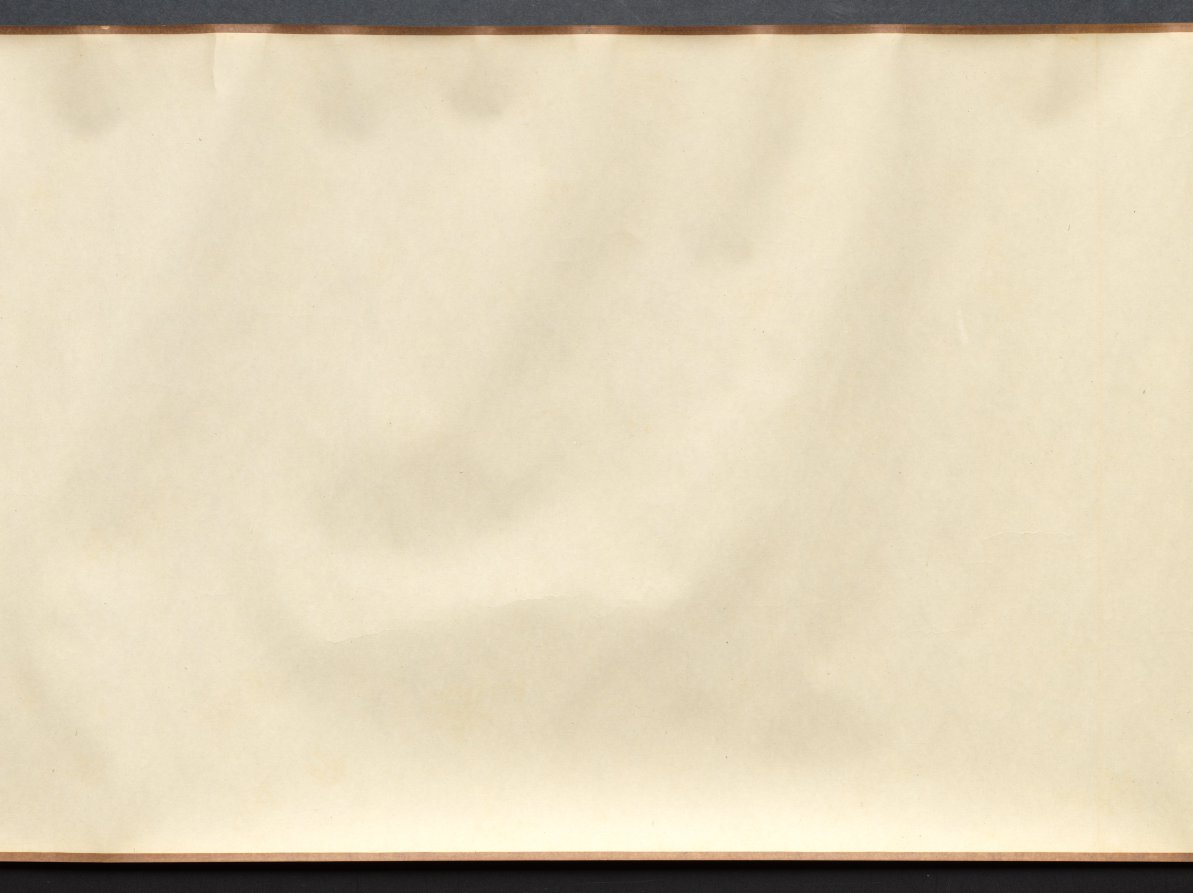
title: Returning to the Village in a Rainstorm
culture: China, Ming dynasty (1368–1644)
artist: Xie Shichen (Chinese, 1487–after 1567)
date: 1530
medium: Handscroll; ink and light color on silk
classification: Painting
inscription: 風雨歸村圖 嘉靖庚寅秋日樗仙謝時臣. [印] 謝時臣印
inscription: 3 additional seals unidentified.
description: This scroll depicts a wind- and rainswept landscape with figures in the countryside struggling against a late summer monsoon rainstorm. Such weather was familiar to residents of the lower Yangzi delta. Xie Shichen spent most of his life in the Suzhou area. Details of his career are scant, but his surviving works suggest that he made his living as a professional painter. This painting conveys drama and anecdotal observations, characteristic of Zhe school paintings, such as the one by Lü Wenying, CMA 1970.76.